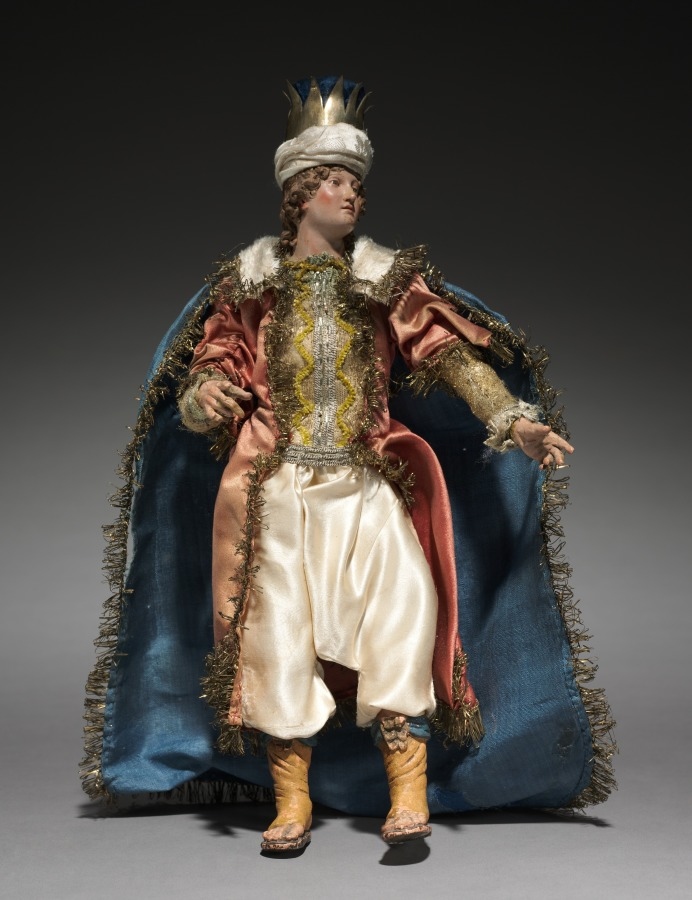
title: Figure from a Crèche: Youthful Magus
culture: Italy, Naples, late 18th-early 19th century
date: 1780–1830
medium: painted wood and terracotta with various textiles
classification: Sculpture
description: The practice of creating scenes of the Nativity for the home dates from the early 1700s in Italy, where people began to set up doll-like figures of about a foot or less in height. The custom was particularly popular in Naples around 1800, where crèche scenes (crèche means cradle, or crib) included many figures, whose heads and hands of painted terracotta, stuffed cloth bodies, and clothing adapted from contemporary local costumes gave them an amazingly realistic character. Representations of the birth of Jesus can be traced to the first few centuries of Christianity. Both living creatures and sculptural depictions of them were used from early times. By the late middle ages it was customary to create life-size figures of wood or stone, naturalistically painted, to represent the characters who participated in the events of Jesus's early life. These sculptures were then arranged in scenes illustrating one or both of the most important of these events, the Adoration of the Shepherds and the Adoration of the Magi-the three kings from the East who came to pay homage to the Christ child. Used in churches, these large figures were especially popular in Italy, Central Europe, Spain, and Portugal.